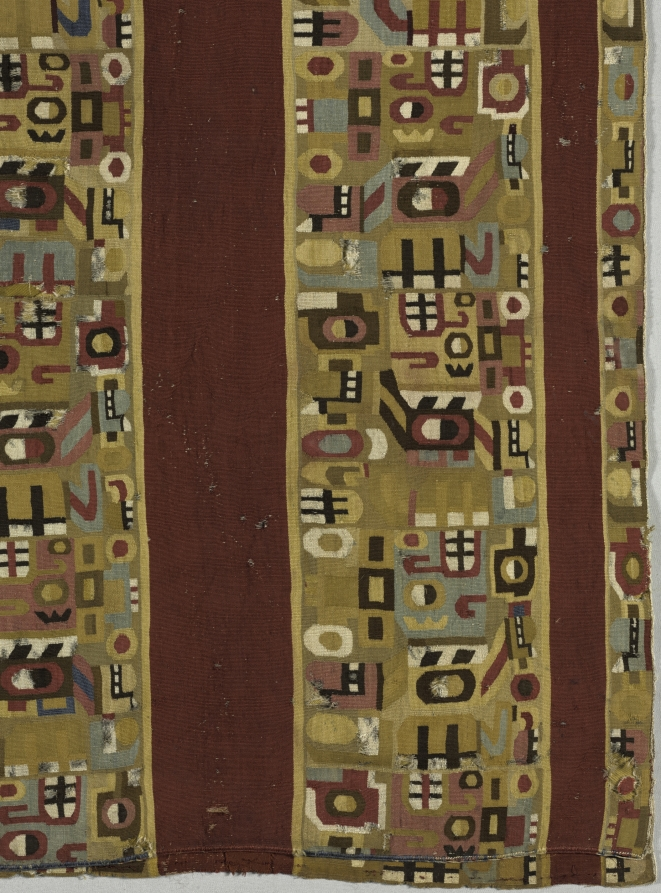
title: Tunic with Sacrificer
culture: South America, Peru, Central Andes, Middle Horizon, Wari people, 7th-11th century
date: 600–1000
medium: camelid-fiber, cotton; tapestry weave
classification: Textile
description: An extremely abstract supernatural sacrifice repeats in different colors and orientations across the body of this tunic, which was shortened on one side in antiquity. Look for the toothy black-and-white mouth in the sacrificer's upward-gazing head; other facial features include a button nose and a vertically divided eye. The figure holds the L-shaped haft of an axe behind its back and, at the front of its body, a short staff with a severed, upside-down human head on the top.